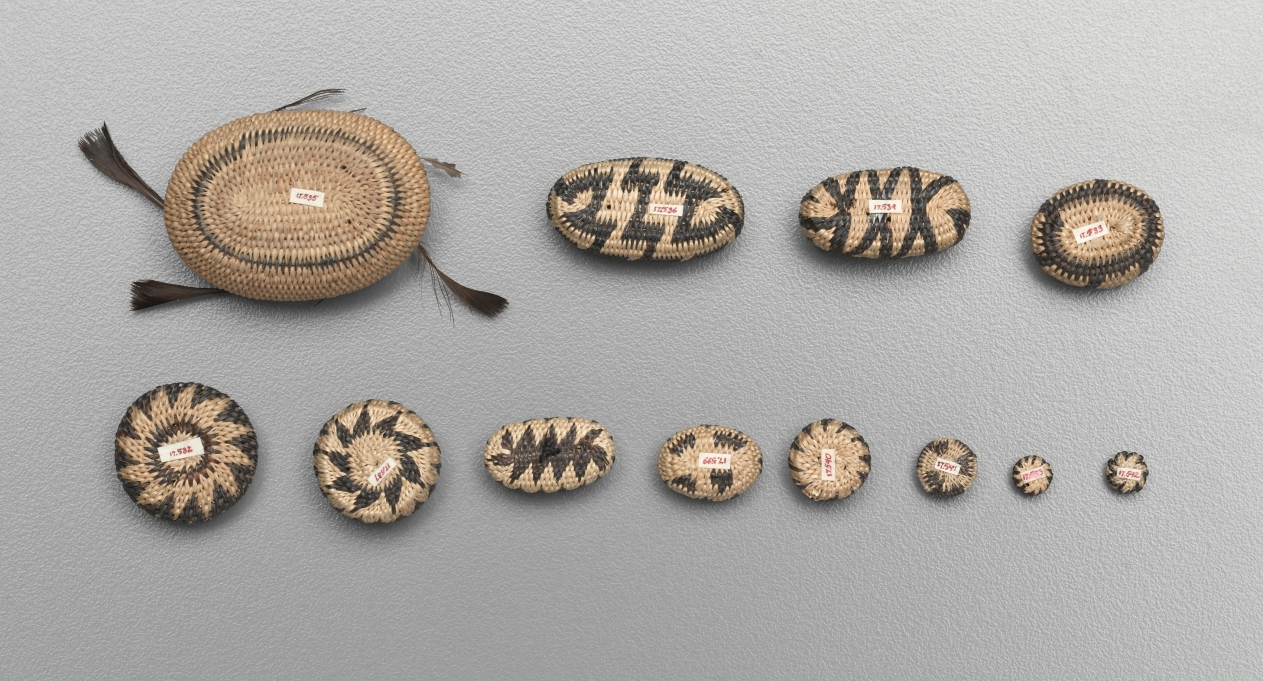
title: Miniature Oval Basket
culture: California, Pomo, 20th century (?)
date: Early 1900s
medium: coiled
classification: Basketry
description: Miniature baskets were made to demonstrate the basket-maker’s virtuoso skill, and these tiny marvels seem to be no exception—the smallest are just a few millimeters wide but still patterned. For such fine work, dexterity was required as much for preparation of materials as for weaving.